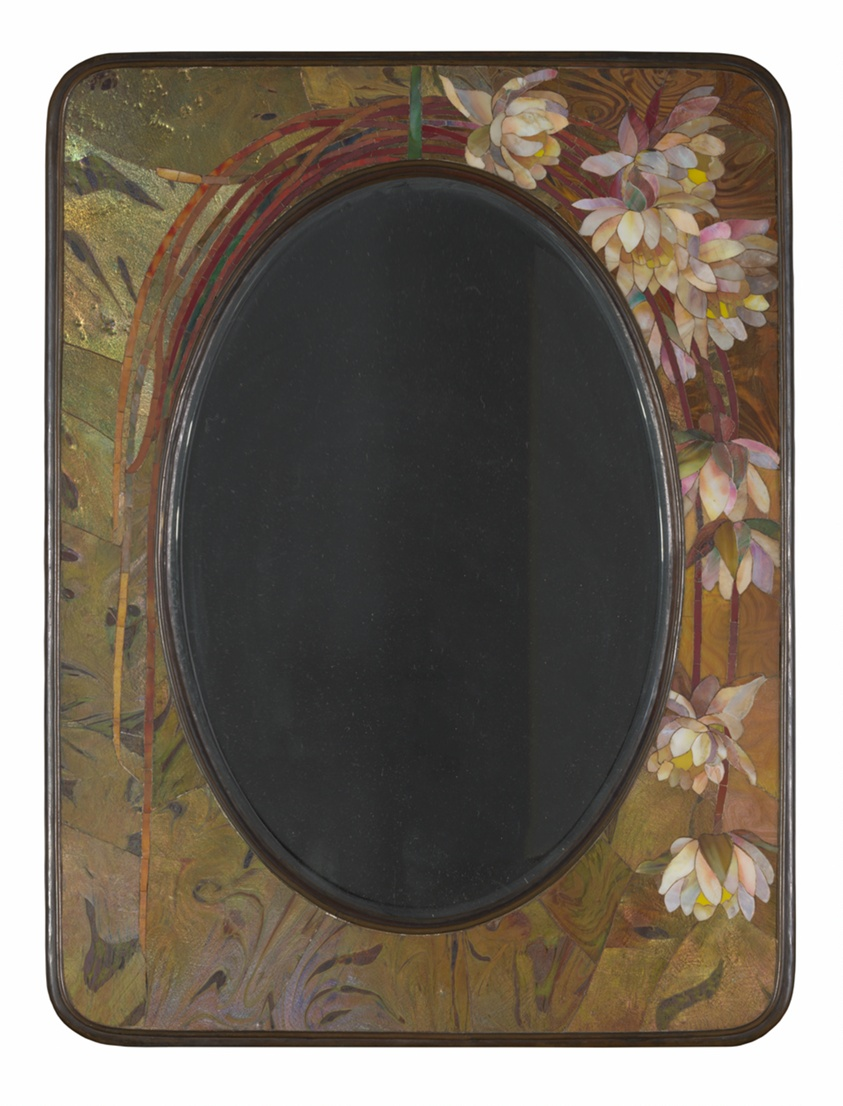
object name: Furnishings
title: Mirror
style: Arts and Crafts Movement, 20th Century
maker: Possibly designed by Clara Pierce Wolcott Driscoll (American, 1861–1944); and/or Joseph Briggs (American, born England, 1873–1937); Tiffany Glass and Decorating Company (American, 1894–1902); or Tiffany Studios (American, 1902–32); Corona, New York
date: c. 1901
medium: Favrile glass, mirrored glass, and bronze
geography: Corona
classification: flat mirrors; american decorative arts; decorative arts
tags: lotus, reflections, swirl motifs